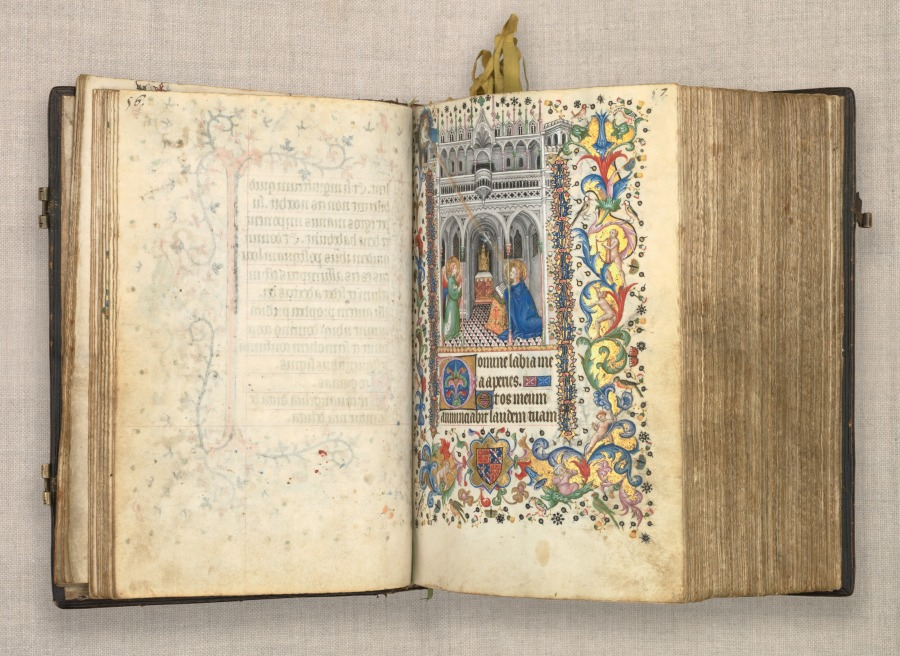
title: Hours of Charles the Noble, King of Navarre (1361-1425): fol. 29r,The Annunciation (Matins)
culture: France, Paris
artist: Master of the Brussels Initials and Associates (French)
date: c. 1405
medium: ink, tempera, and gold on vellum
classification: Bound Volume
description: This precious volume was obviously highly prized by its owner, the French-born King of Navarre, who had his coat of arms painted on no less than 20 folios. Rather than directly commissioning this manuscript from a specific workshop, it seems that Charles the Noble acquired his book of hours—perhaps made for the luxury market—while on a trip to Paris in 1404–5. A collaborative effort, six painting styles are seen within the pages of this codex, those of two Italians, two Frenchmen, and two Netherlanders. The painter who was responsible for the planning and decoration of the book, and who produced 17 of the large miniatures, was a Bolognese artist known as the Master of the Brussels Initials.